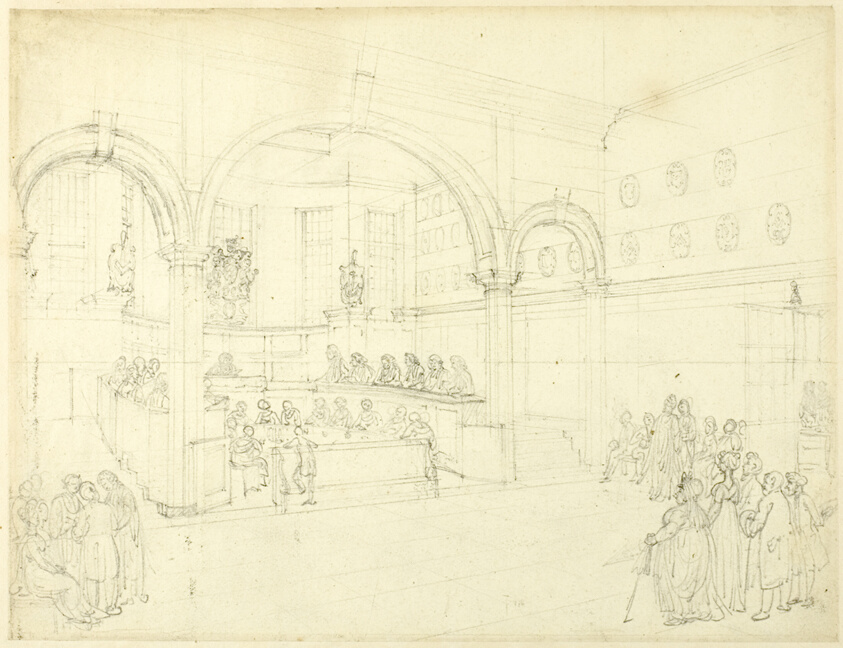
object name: Drawing and Watercolor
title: Study for Doctor's Commons, from Microcosm of London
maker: Augustus Charles Pugin (English, born France, 1762-1832); Thomas Rowlandson (English, 1756-1827)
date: c. 1808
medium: Graphite on ivory wove paper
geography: England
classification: graphite; drawings (visual works); prints and drawing